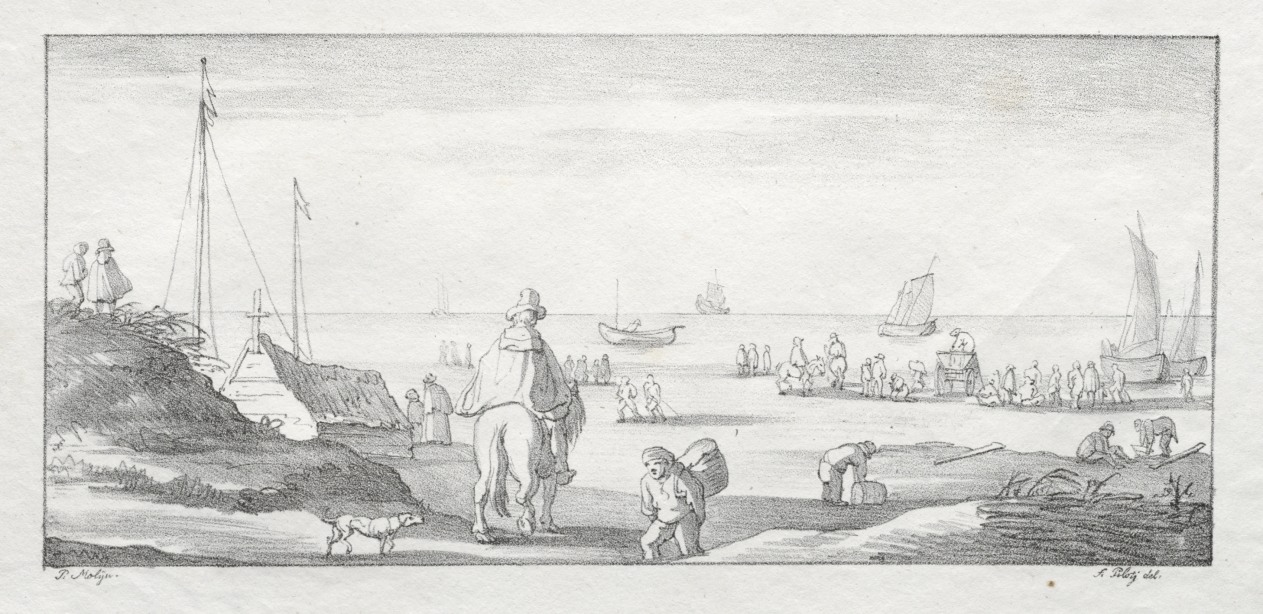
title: Along a Dutch Shore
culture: Germany, 19th century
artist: Ferdinand I Piloty (German, 1786–1844)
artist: after Pieter Molyn (Dutch, 1595–1661)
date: 1811–1816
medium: lithograph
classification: Print